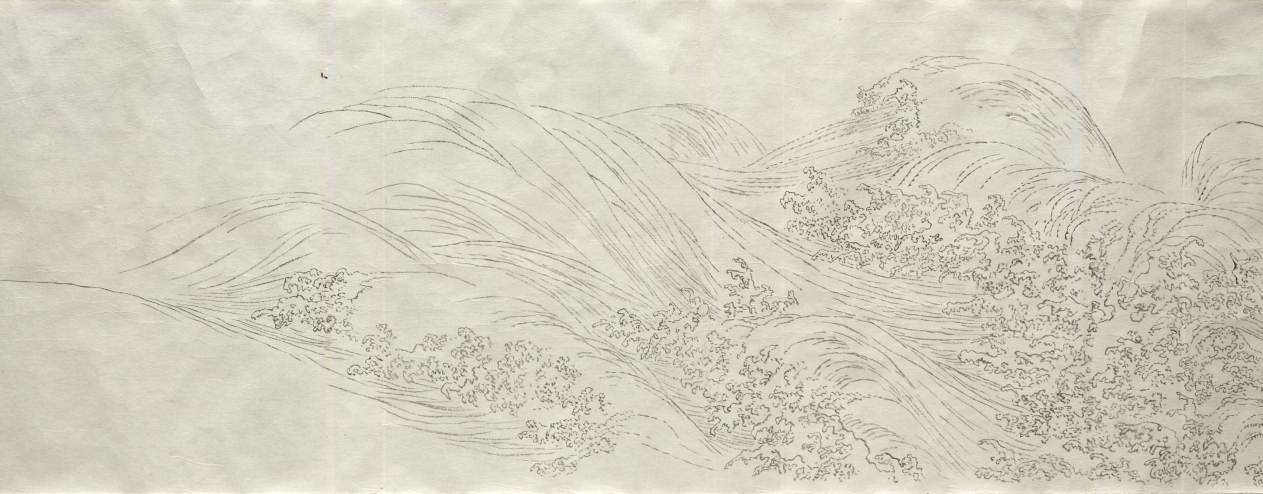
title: Sketch Copy of Natural Disasters, from the Seven Fortunes and Misfortunes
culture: Japan, Edo period (1615–1868) to Meiji period (1868–1912)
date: after 1773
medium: handscroll; ink and color on paper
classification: Painting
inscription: Signed: Gettcho; dated 1773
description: This unmounted handscroll is a copy of the first of a three-scroll set painted by Maruyama Ōkyo (1733–1795) for Buddhist monk Yujō (1723–1773). It depicts people's unfortunate encounters with forces of nature from wind to beasts. Ōkyo's realistic, contemporary imagery was meant to evoke a sense of recognition and empathy in viewers, shocking them into avoidance of possible punishments.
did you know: Notations that appear throughout the scroll indicate colors and other details of the original painting.